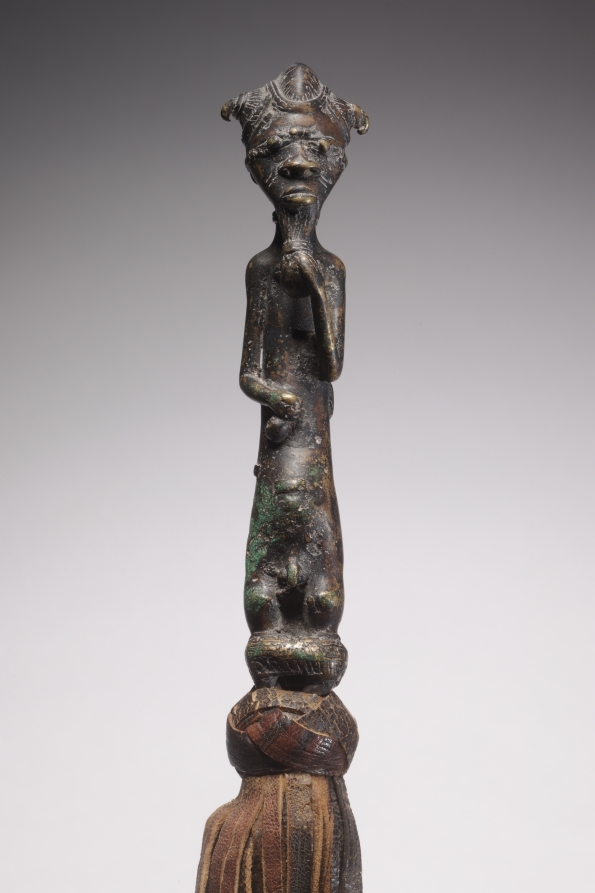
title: Flywhisk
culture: Africa, West Africa, Côte d'Ivoire, Baule-style maker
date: c. 1850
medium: Copper alloy and leather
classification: Sculpture